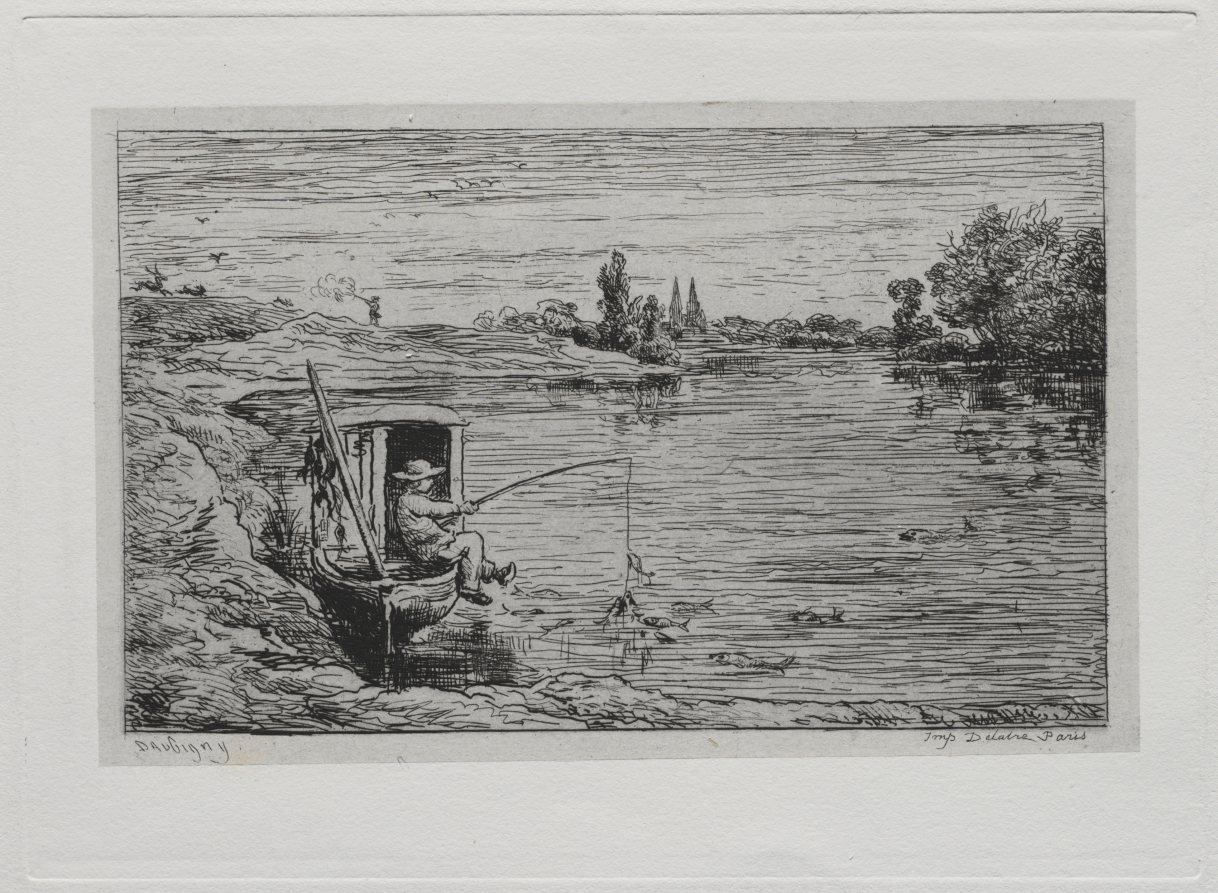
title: The Boat Trip: The Cabin Boy Fishing (Line Fishing)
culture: France, 19th century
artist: Charles François Daubigny (French, 1817–1878)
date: 1861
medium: etching with chine collé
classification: Portfolio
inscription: lower left corner, in graphite: L. D. 110